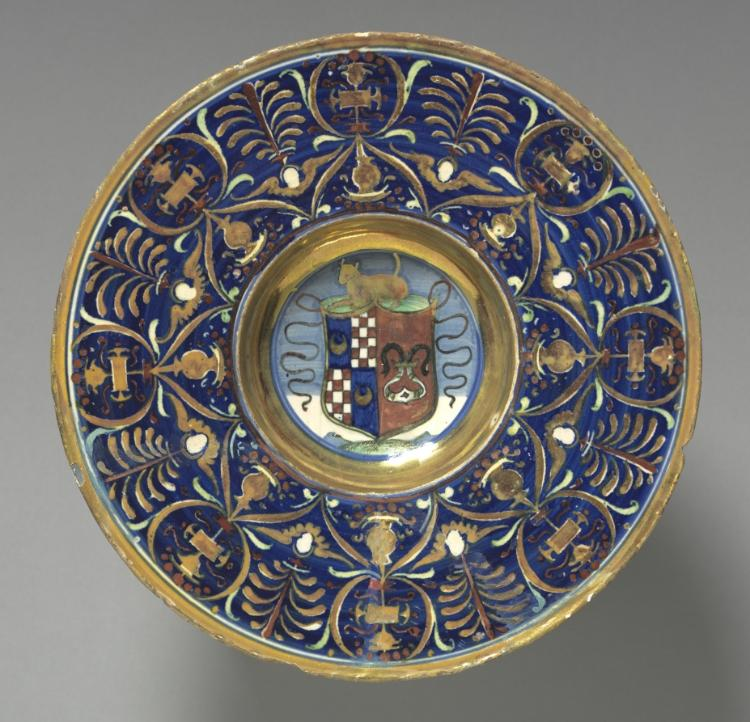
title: Plate with Arms of the Vitelleschi Family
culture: Italy, Urbino region, Gubbio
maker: circle of Maestro Giorgio Andreoli (Italian, 1465?–1553)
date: 1527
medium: tin-glazed earthenware with gold luster (maiolica)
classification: Ceramic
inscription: signed: M. G da Agubio, 1527.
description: Italian nobles of the 1500s often expressed their wealth, social status, and sophistication by ordering large sets of maiolica that sometimes carried their coats of arms or even likenesses, usually in profile as in portraits of the period. Reserved for use at festival events such as a wedding or commissioned to mark a special occasion or an important visit, elaborately decorated utilitarian vessels in maiolica were prized as works of art by their owners and displayed as such in their residences.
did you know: Today, the Palazzo Vitelleschi, home of the Vitelleschi family in Tarquinia, a coastal town north of Rome, is an archaeological museum.